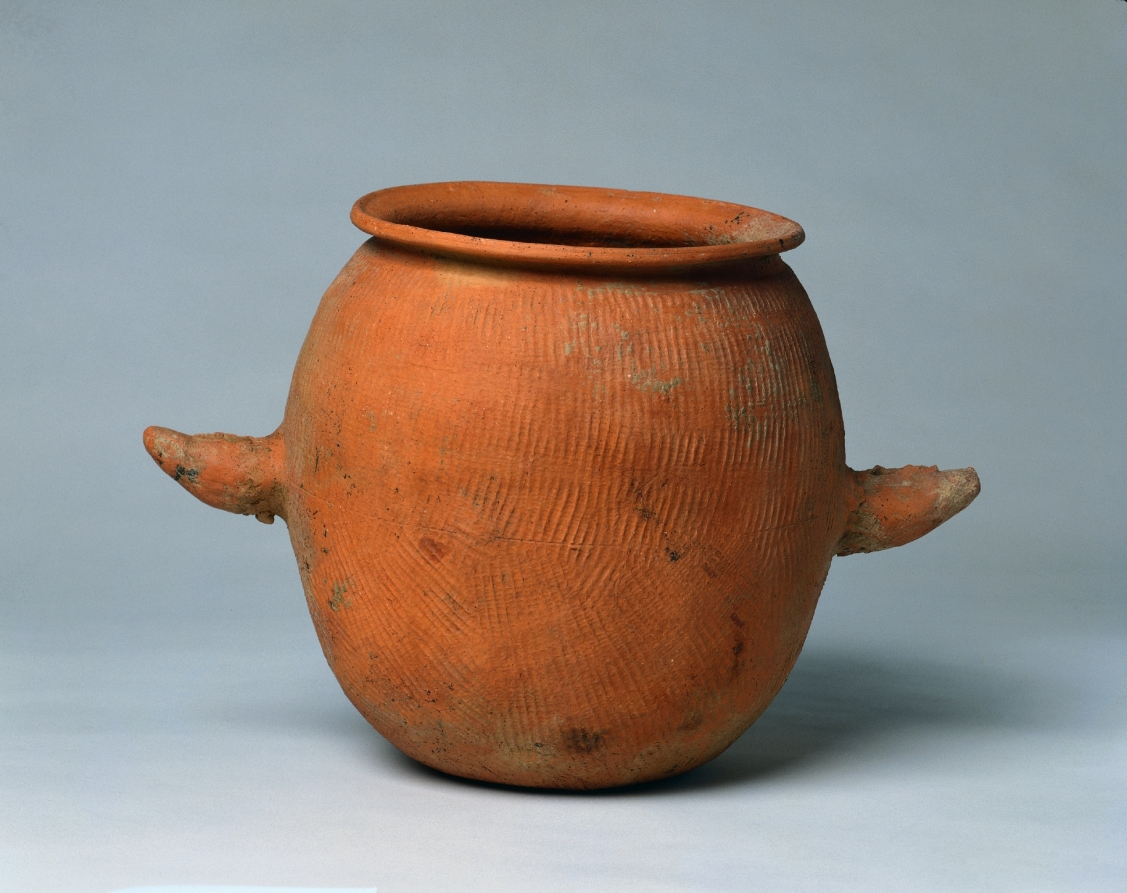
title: Jar with Horn-Shaped Handles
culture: Korea, Three Kingdoms period (57 BCE–668 CE)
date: 100s CE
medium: earthenware with impressed surface designs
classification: Ceramic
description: Although the function of this earthenware vessel remains unknown, its low-fired red surface indicates the various steps in its fabrication. First, coils of clay were layered on top of one another and pinched together to form the wall of the pot. Then wood mallets with carved surfaces pounded these walls simultaneously, inside and out, merging and thinning the clay bands. Thus the impressed designs visible on both the inner and outer surfaces were functional as well as decorative. A single incised line courses across the body wall of impressed patterns, linking the two "horns." Each of these is pierced to allow a uniform firing of the entire vessel. The function of the "horn" handles remains unknown. The smooth, finished surfaces of the short neck and thick, rounded mouth of the vessel indicate the use of a potter's wheel to complete the form. This rare vessel probably comes from the southwestern region of the Korean peninsula.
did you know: Closed kilns built on hillsides became widely used for producing this type of pottery vessel in Korea during the Three Kingdoms period.